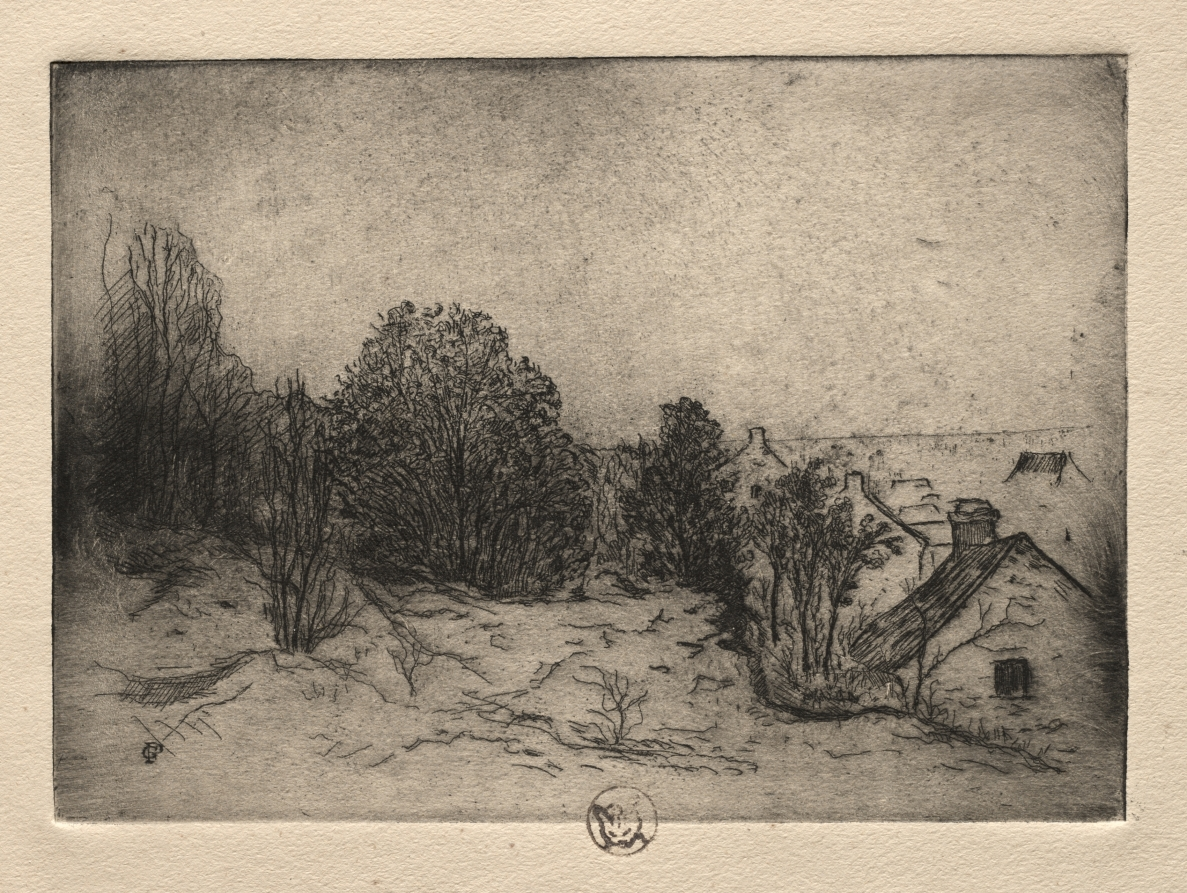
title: Six Etchings: Vesnots, Auvers on the Oise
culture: France, 19th century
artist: Paul Gachet (French, 1828–1909)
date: 1895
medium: etching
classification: Print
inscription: verso, in brown ink: Les Vesnots. Auvers/oise (S et O) [Seine and Oise Rivers]